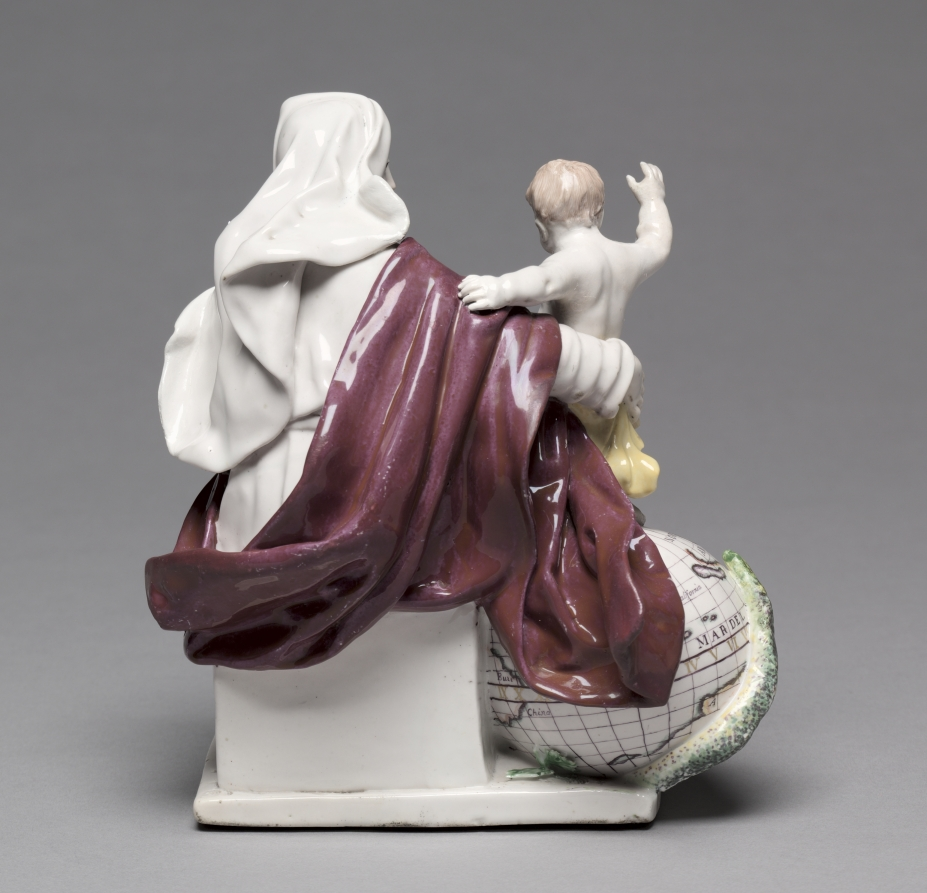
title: Madonna and Child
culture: England, Chelsea, 18th century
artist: Chelsea Porcelain Factory (Britain, London, 1745–84)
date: c. 1755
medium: porcelain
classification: Ceramic